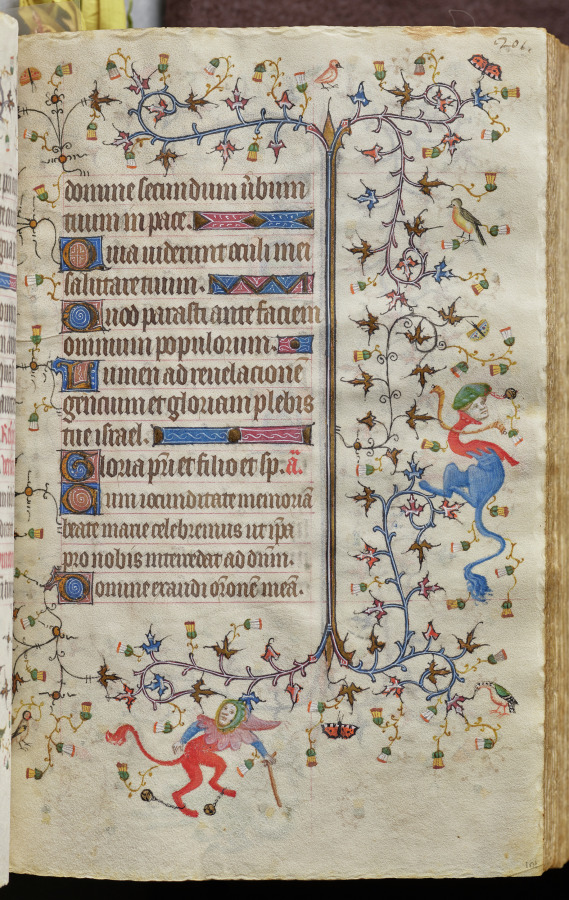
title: Hours of Charles the Noble, King of Navarre (1361-1425): fol. 101r, Text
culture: France, Paris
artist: Master of the Brussels Initials and Associates (French)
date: c. 1405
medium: ink, tempera, and gold on vellum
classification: Bound Volume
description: This precious volume was obviously highly prized by its owner, the French-born King of Navarre, who had his coat of arms painted on no less than twenty folios. Rather than directly commissioning this manuscript from a specific workshop, it seems that Charles the Noble acquired his book of hours -- perhaps ready-made for the luxury market -- while on a trip to Paris in 1404-05. A collaborative effort, six painting styles are evidenced within the pages of this codex, those of two Italians, two Frenchmen, and two Netherlanders. The painter who was responsible for the planning and decoration of the book, and who produced seventeen of the large miniatures, was a Bolognese artist known as the Master of the Brussels Initials. His principal assistant, responsible for most of the borders, was a Florentine who signed his name "Zecho" da Firenze on folio 208 verso.